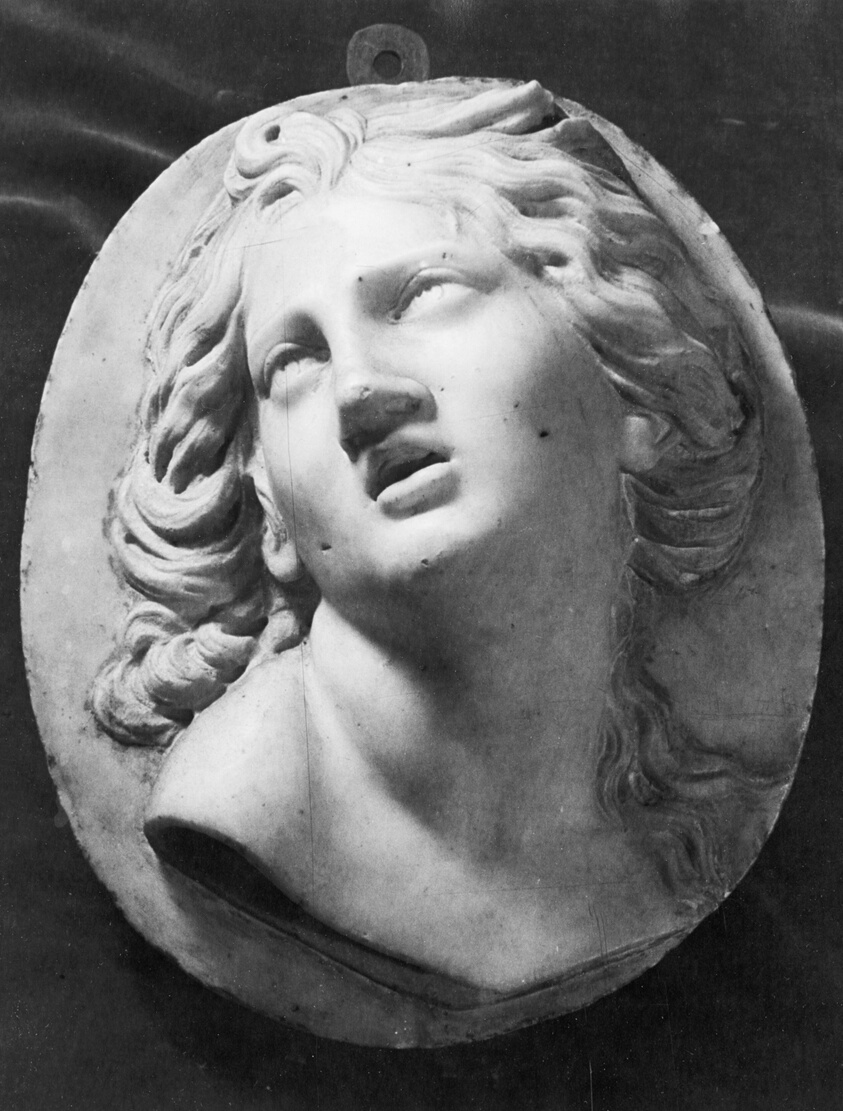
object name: Sculpture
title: Head (one of a pair)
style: 17th Century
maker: Artist unknown (Italian, active 18th century)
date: 1700/1800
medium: Marble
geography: Italy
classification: relief; sculpture; Italian; marble; sculpture/stone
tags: head, figure, faces, woman